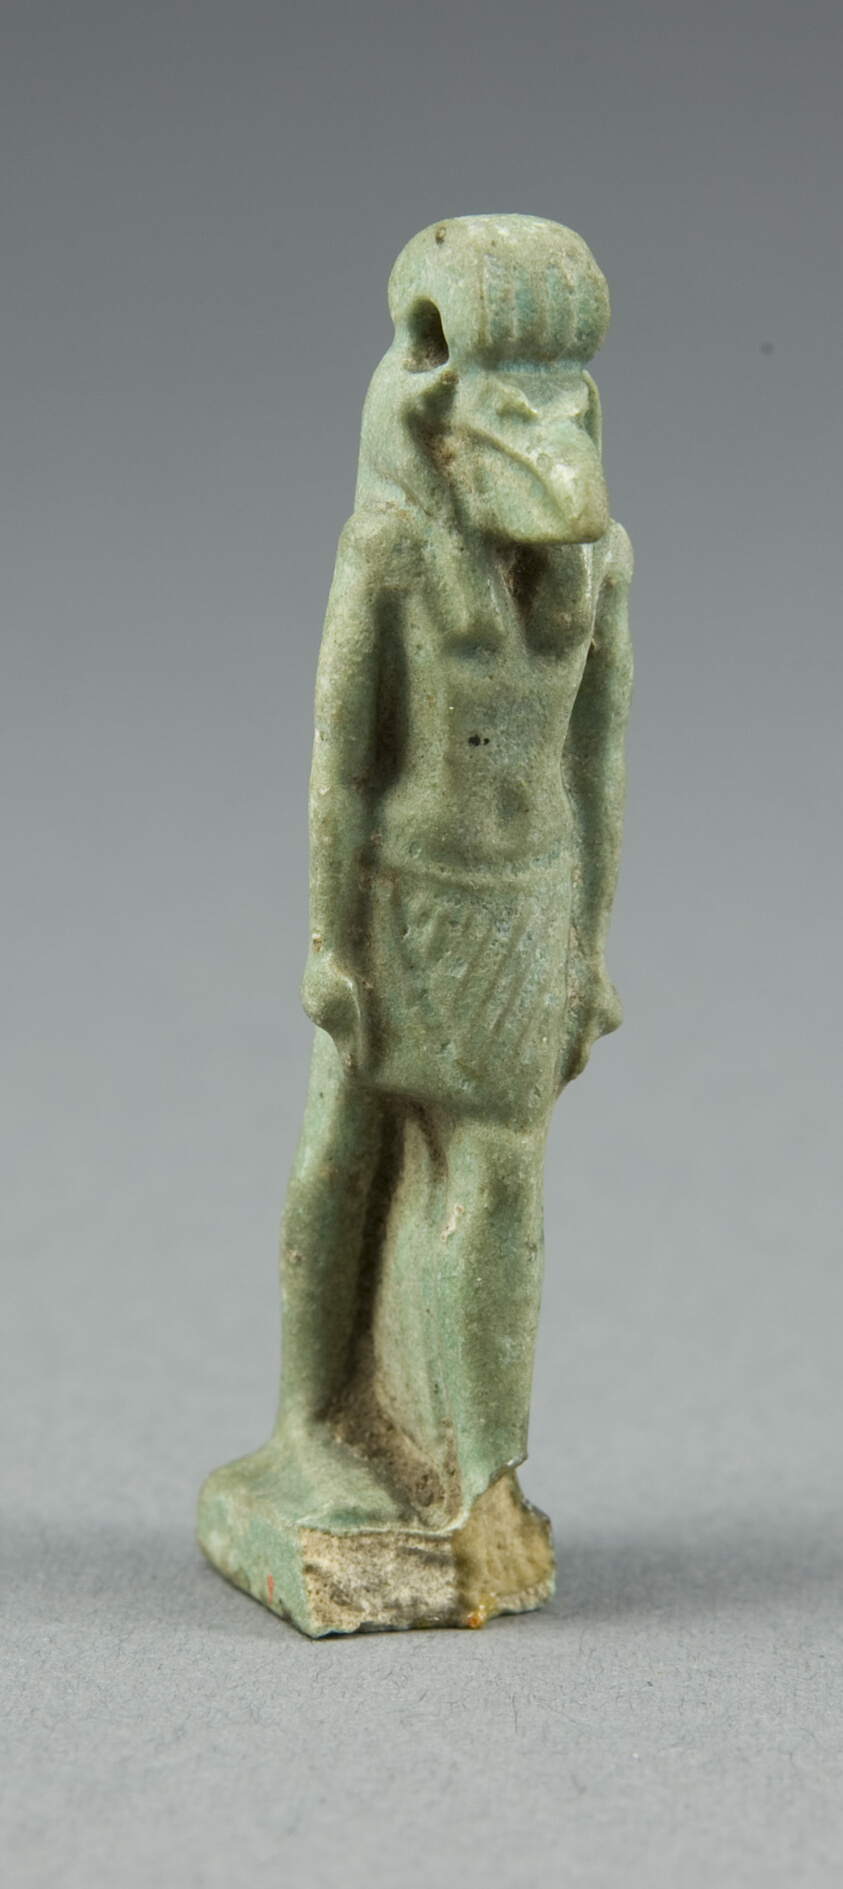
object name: Costume and Accessories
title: Amulet of the God Thoth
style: egyptian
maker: Egyptian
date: Late Period, Dynasties 26–31 (664–332 BCE)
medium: Faience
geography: Egypt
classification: amulet; jewelry; ceramics; ancient art; costume; faïence (composite material)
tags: gods (deities)